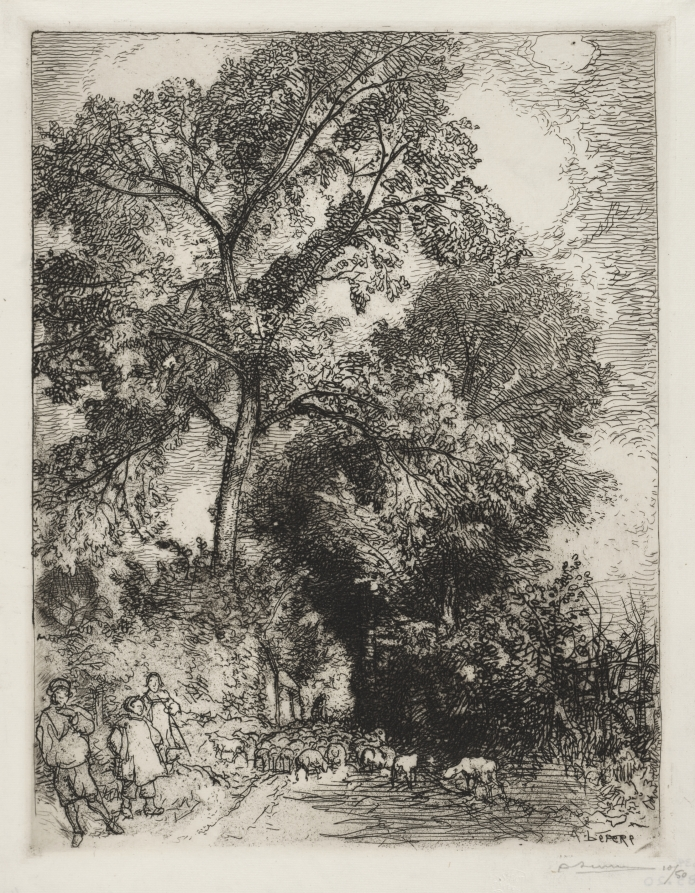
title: Le Retour du Troupeau, Crèvecoeur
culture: France, 20th century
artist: Auguste Louis Lepère (French, 1849–1918)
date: 1913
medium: etching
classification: Print